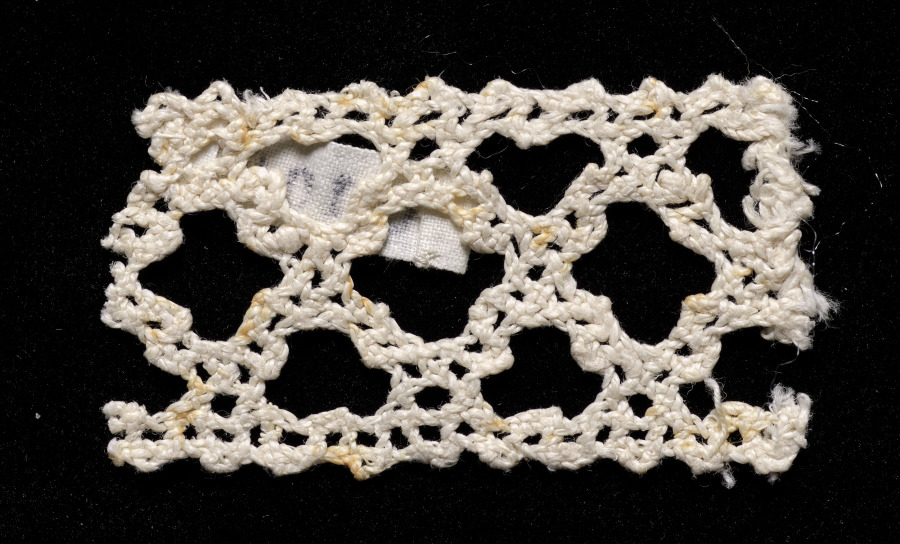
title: Lace Insertion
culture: Italy, Venice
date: 1540–60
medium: Bobbin lace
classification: Lace